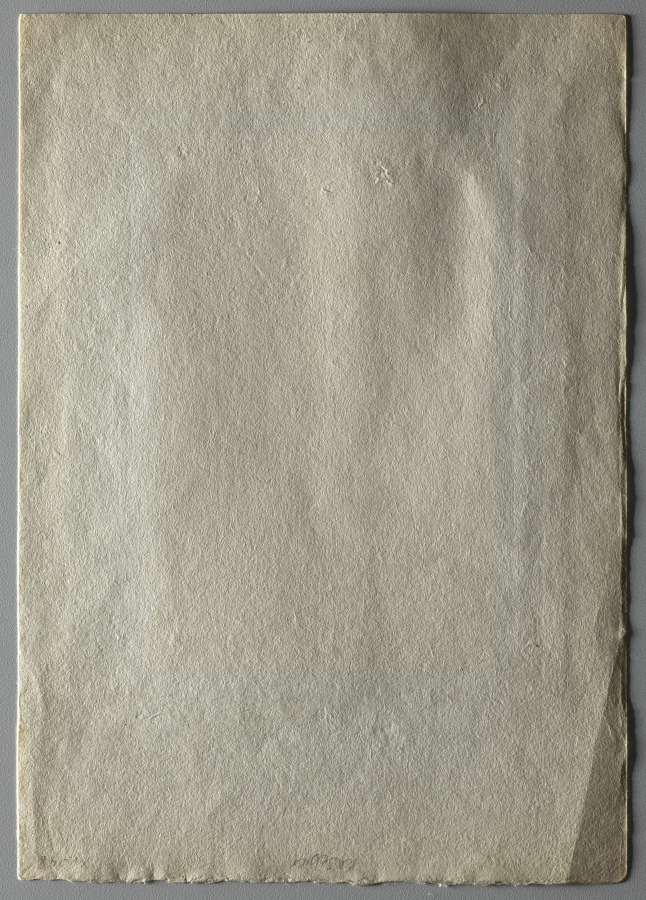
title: Italy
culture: America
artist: Gertrude Käsebier (American, 1852–1934)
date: c. 1889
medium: platinum print mounted to Japanese paper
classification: Photograph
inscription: Written in pencil on verso of photograph: Mar/7 x 10”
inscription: Written in pencil on verso of mount: “Kasebier x 1.08”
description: Italy provides insight into Käsebier’s earliest artistic productions. The woman’s pose and central placement emphasize the picture’s formalism and careful construction. Her rigid vertical posture echoes the trees in the background. Soft focus, a device borrowed from Pictorialist photography, frustrates a clear view of her features, suggesting that the image is neither portrait nor snapshot but a symbolic statement about womanhood and its association with nature.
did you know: Gertrude Käsebier did not begin to study art until she was 37 and had 3 adolescent children.